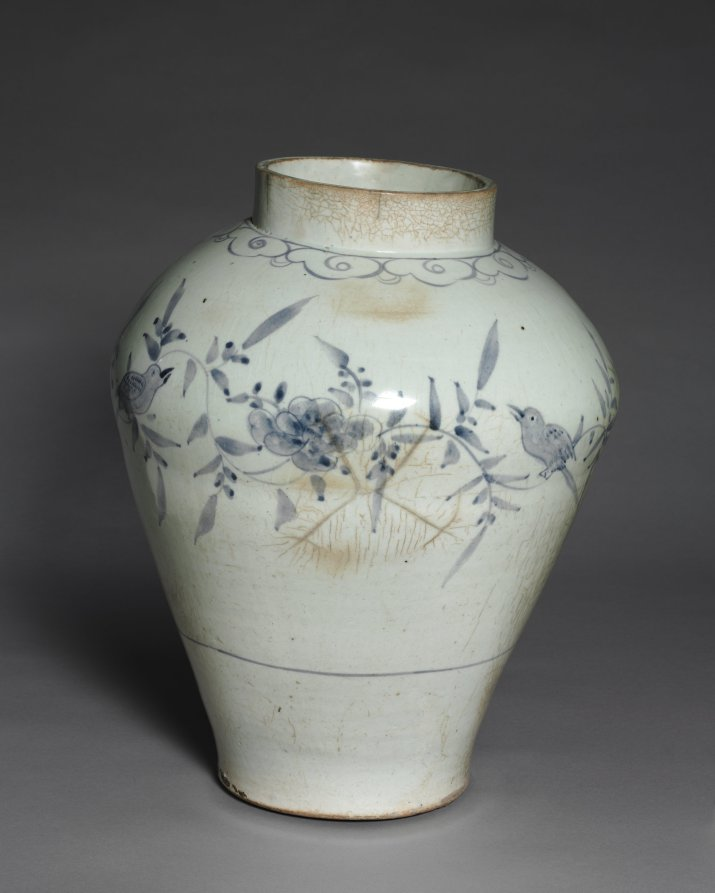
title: Jar with Bird and Flower Decoration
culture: Korea, Joseon dynasty (1392–1910)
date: 1700s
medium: stoneware with underglaze blue designs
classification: Ceramic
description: Joseon blue-and-white porcelains were called “靑畫," meaning “painted in blue.” The blue here indicates cobalt pigment. In the 1700s, the royal court banned the importation of cobalt blue for its luxurious nature; thus, relatively few Joseon blue-and-white porcelain vessels were produced at that time. In that context, this modest-looking jar was considered to be a rare luxury.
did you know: Cobalt blue, an expensive imported mineral from Persia (modern-day Iran), was officially banned for use in Korea during the 1700s.